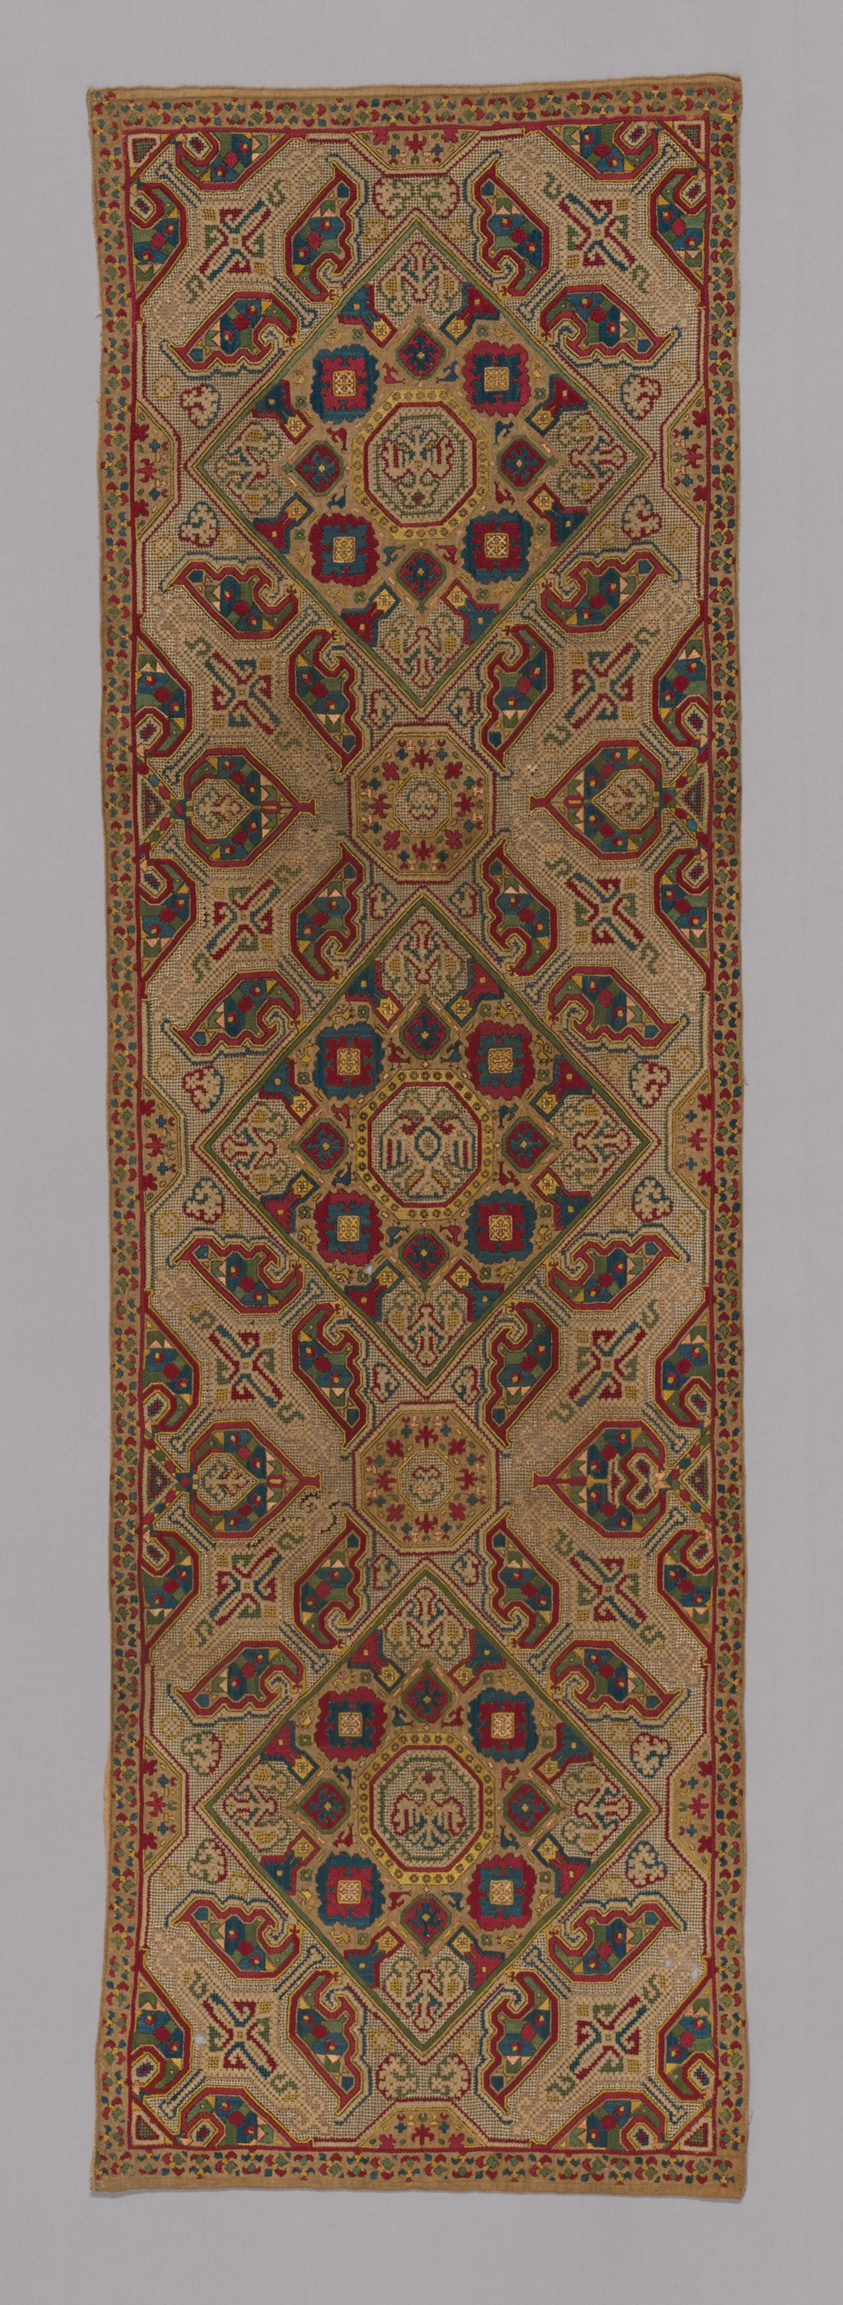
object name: Textile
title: Panel (Bolster Cover)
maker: Greece, Ionian Islands, Leukas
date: 1700/1900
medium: Linen, plain weave; cut and drawn work embroidered with silk in darning and overcast stitches; embroidered in double running, split, and stem stitches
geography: Greece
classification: textile; needlework (visual works)